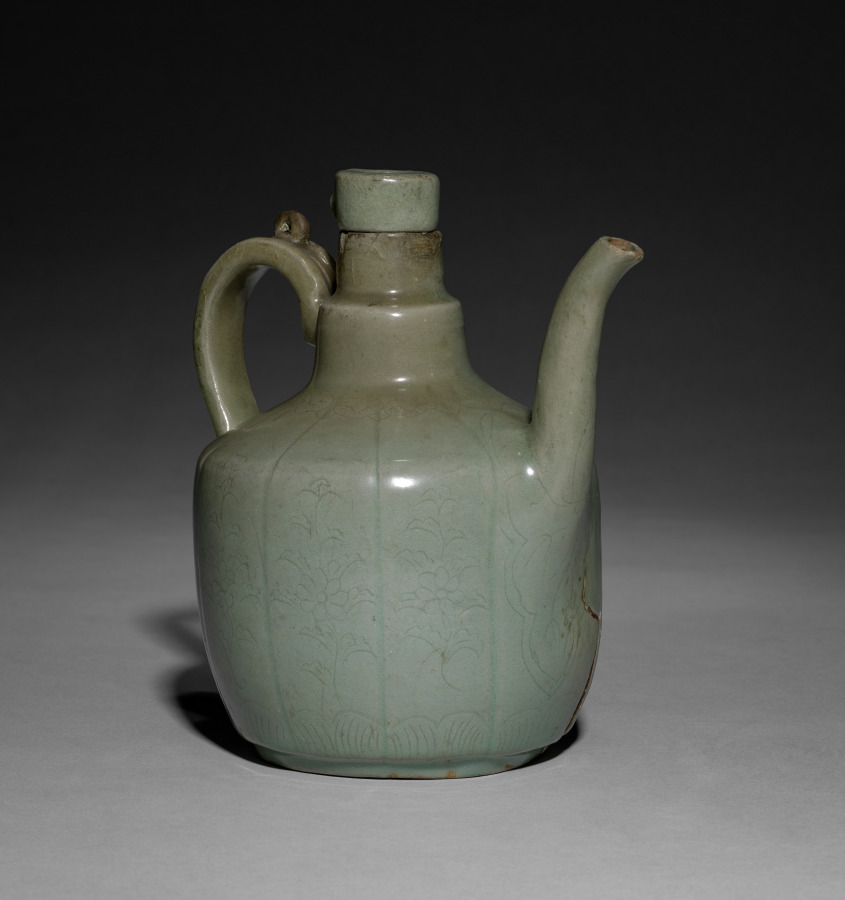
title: Wine Pot with Incised Chrysanthemum Design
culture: Korea, Goryeo dynasty (918–1392)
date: 1100s-1200s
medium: pottery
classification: Ceramic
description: As early as the seventh century, the practice of drinking tea and wine became an important part of elite culture in Korea. Elites of the Goryeo period commissioned a variety of types of utensils and vessels including this elegant wine pot, not only to make their drinking experience more exciting, but also to show their appreciation of nature.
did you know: A chain or cord once connected a small loop on the handle and the lid to serve beverages without spilling.